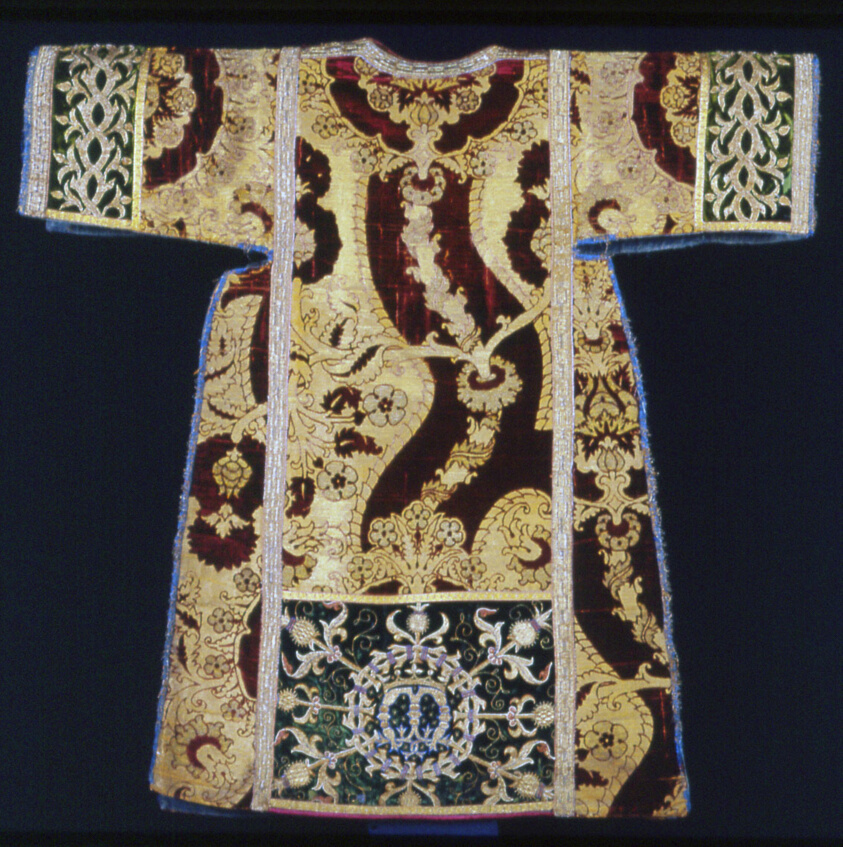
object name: Textile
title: Two Dalmatics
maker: Italy or Spain (cuffs and apparels: Spain)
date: Late 15th/early 16th century (cuffs and apparels: late 15th century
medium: Velvet: silk, plain weave variation with silk supplementary facing wefts, weft-float faced 1:2 'Z' twill interlacings of secondary binding warps and gilt-metal-strip-wrapped silk, supplementary facing wefts forming weft loops, and supplementary pile warps forming cut and uncut, pile-on-pile, voided velvet; Cuffs and Apparels: silk, warp-float faced 3:1 broken warp chevron twill weave with supplementary pile warps forming cut solid velvet; appliquéd with linen, plain weave; embroidered with silk, linen and gilt-metal-strip-wrapped silk in couching and padded couching; Edge trim: 1) silk, warp-float faced 7:1 satin weave; embroidered with silk and gilt-metal -strip-wrapped silk in couching, and 2) silk and gilt-metal-strip-wrapped silk, plain weave (with multiple wefts) with supplementary patterning wefts and extended ground weft cut and uncut fringe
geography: Spain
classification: textile; needlework (visual works); liturgical; costume; dress (garment); clothing